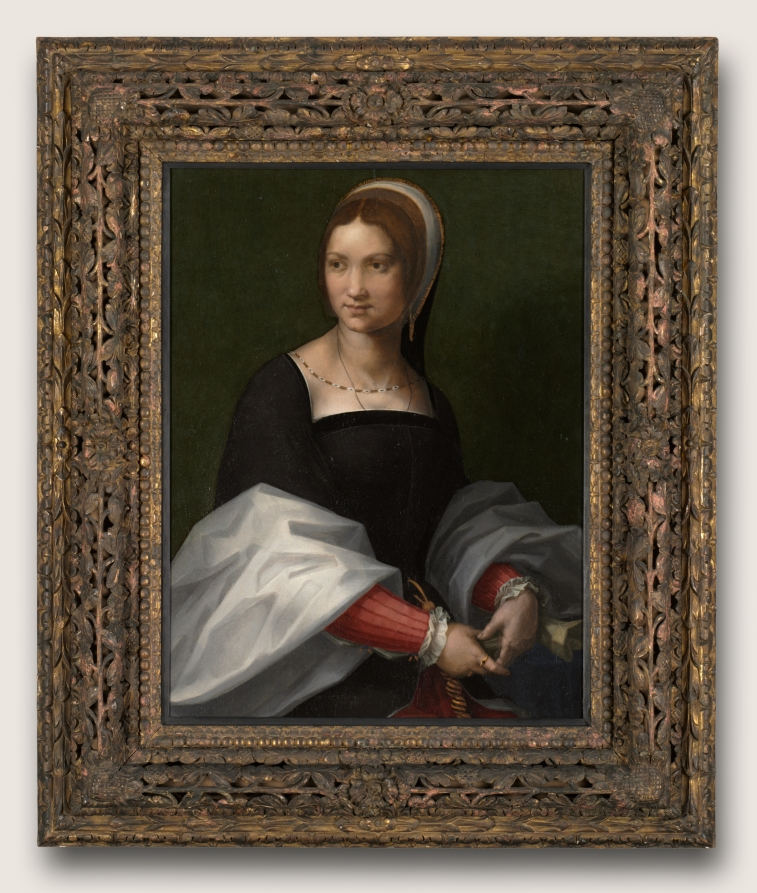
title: Portrait of a Woman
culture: Italy, 16th century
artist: circle of Andrea del Sarto (Italian, 1486–1530)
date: c. 1518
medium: oil on wood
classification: Painting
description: King Francis I’s deep interest in Italian Renaissance culture manifested itself not only through acquiring important works of art but also by bringing leading architects, scholars, and artists to Paris. Chief among these figures was the Florentine painter Andrea del Sarto. The sitter’s distinctively French hood and black veil suggest that someone talented closely connected to the artist painted this work during his brief time in France.